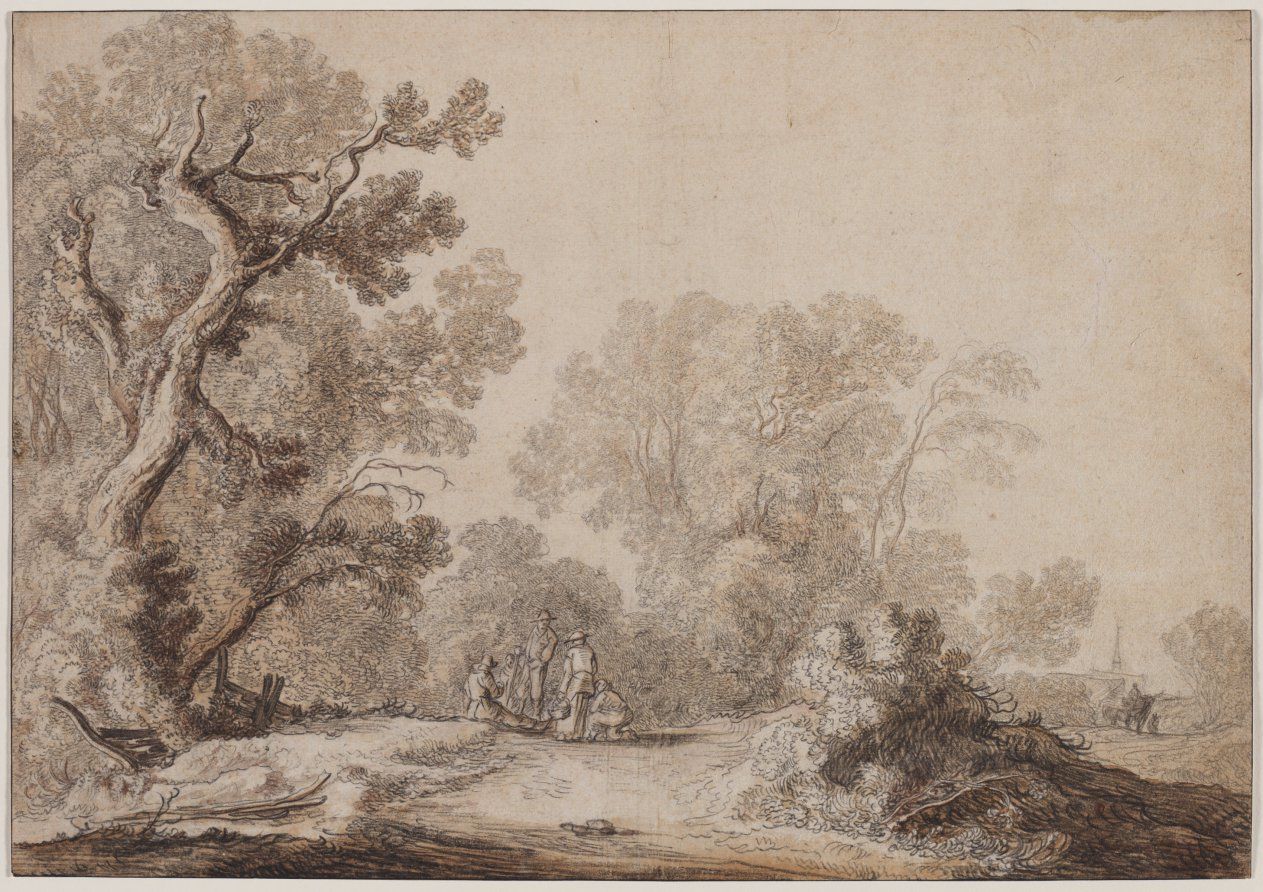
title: Peasants at the Edge of a Wood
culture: Netherlands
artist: Jacob van Mosscher (Dutch, 1655)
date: c. 1630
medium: black chalk and brush and brown wash; framing lines in black ink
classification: Drawing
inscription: VERSO OF SECONDARY SUPPORT, upper left, in graphite: 987 ; lower left, in graphite: Molyn [sideways] ; lower left, in graphite: [j ?]n 6681 [6681 underlined] ; lower right, in graphite: 2242 ; OLD MAT (two fragments, now removed), in graphite: W 74 / 42/21 / 44/64 ; in graphite: "Molyn" ; in graphite: Coll. Spencer Churchill / Coll. Coghlan Briscoe / Coll. J.H.J. Mellaart / Coll. ten Cate (264) / O.M.D. March 1927